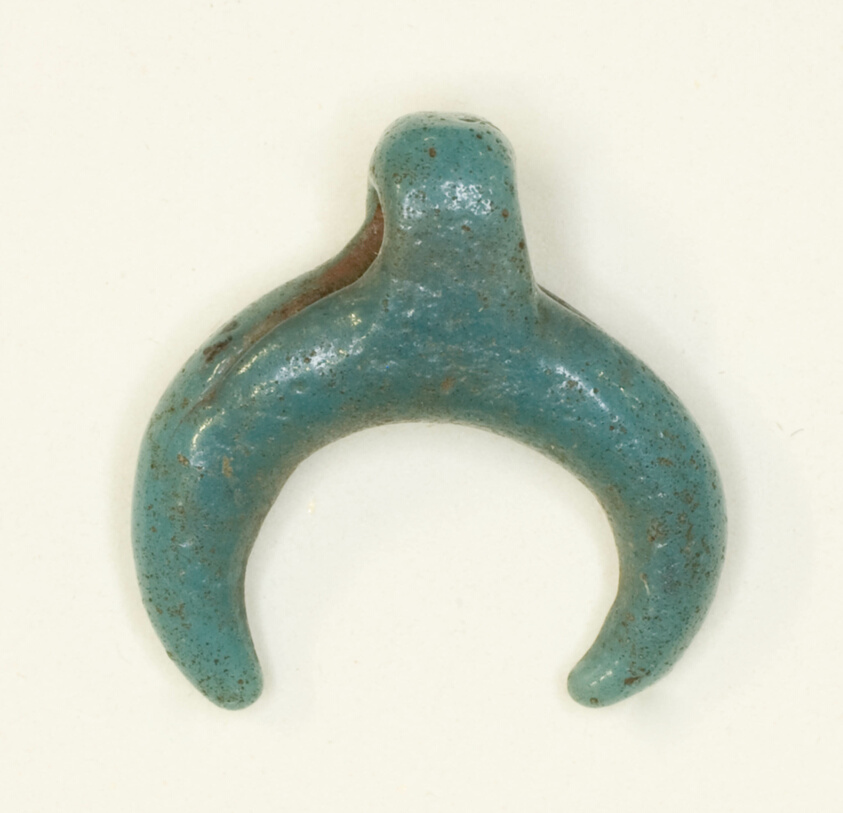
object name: Costume and Accessories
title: Amulet of the Lunar Crescent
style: egyptian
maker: Egyptian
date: New Kingdom–Roman Period (about 16th century BCE–4th century CE)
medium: Glass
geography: Egypt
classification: amulet; jewelry; glass; ancient art; costume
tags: moon